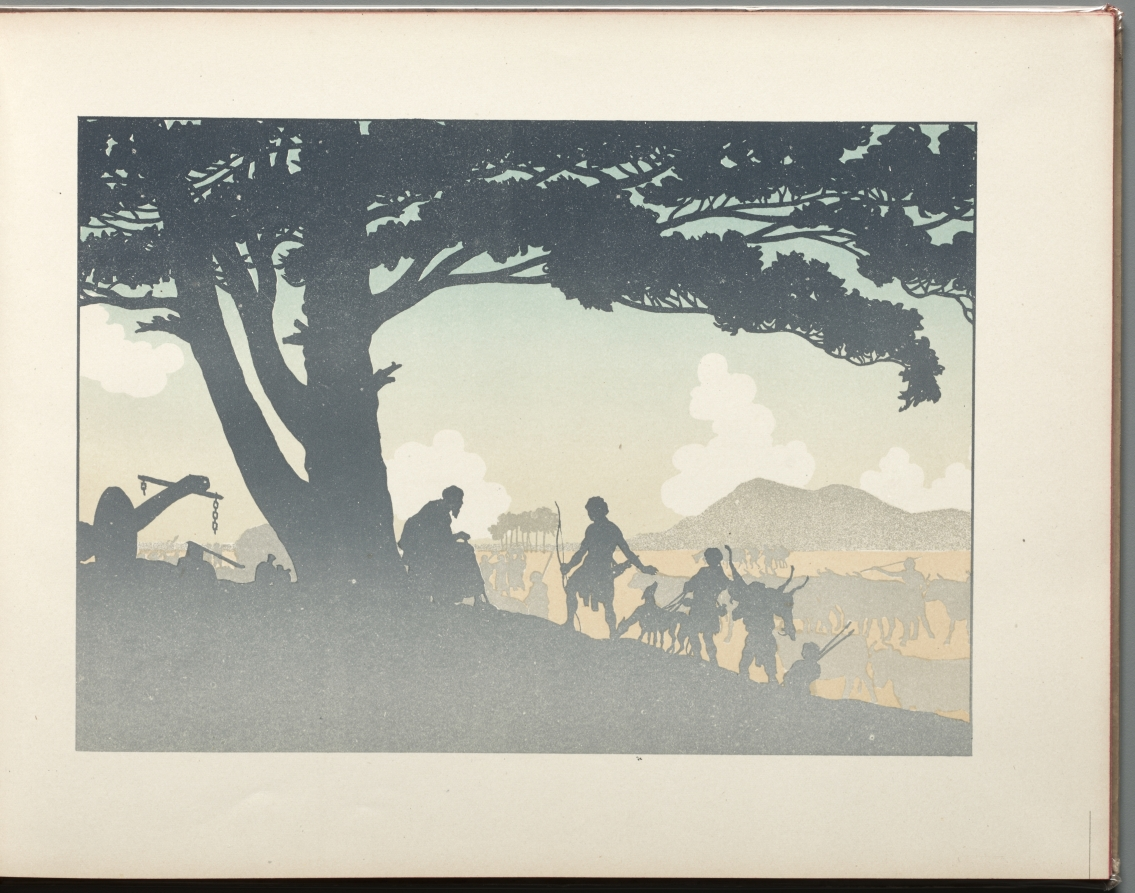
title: The Prodigal Son: page 9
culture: France, 19th century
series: Bound Volume illustrating the poetry and music of Georges Fragerolle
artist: Henri Rivière (French, 1864–1951)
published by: E. Flammarion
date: 1895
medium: 15 color lithographs in a bound volume illustrating the poetry and music of Georges Fragerolle: color lithograph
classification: Bound Volume